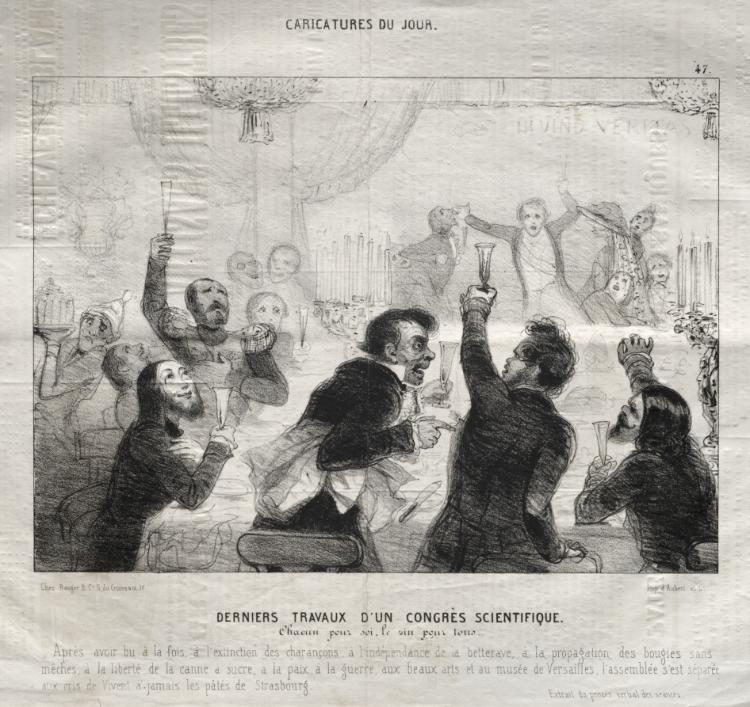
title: Derniere travaux d'un congrès scientifique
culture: France, 19th century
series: Caricatures du Jour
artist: Jules Platier (French)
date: c. 1842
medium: lithograph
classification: Print